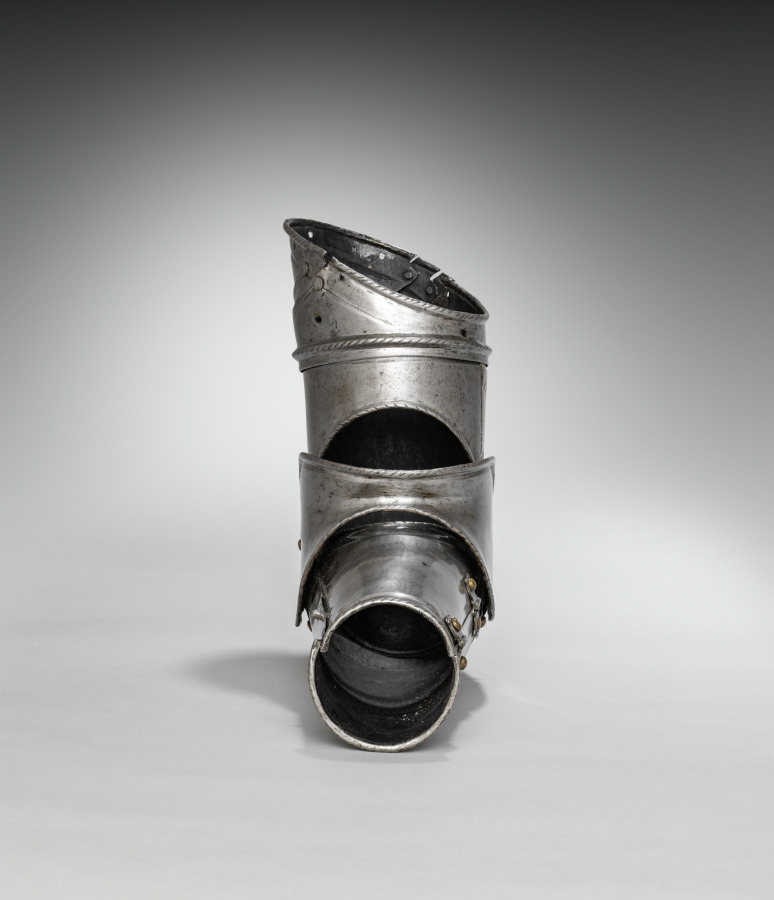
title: Proper Right Arm (Vambrace, Rerebrace and Couter)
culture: South Germany, 16th century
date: c. 1560–80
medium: steel, leather straps, brass rivets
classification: Arms and Armor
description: This armor was developed for the joust--a sporting combat between two mounted contestants. Although all of the elements of this armor date from the same period, they are not all from the same suit. This armor is thus called "composed." It also shows the asymmetry of jousting armor. The participants rode along a wall-like barrier known as a "tilt" with their left sides facing one another. Consequently, armor on that side of the body had to be thicker. Note the large plate (grandguard) over the left shoulder for extra protection. Also, the breathing holes in the helmet were placed on the right side (farthest from an opponent's lance) to avoid injuries from splinters. The bracket attached to the right breastplate is called the lance-rest, a shock-absorbing support designed to accommodate the lance when "couched" under the right armpit.